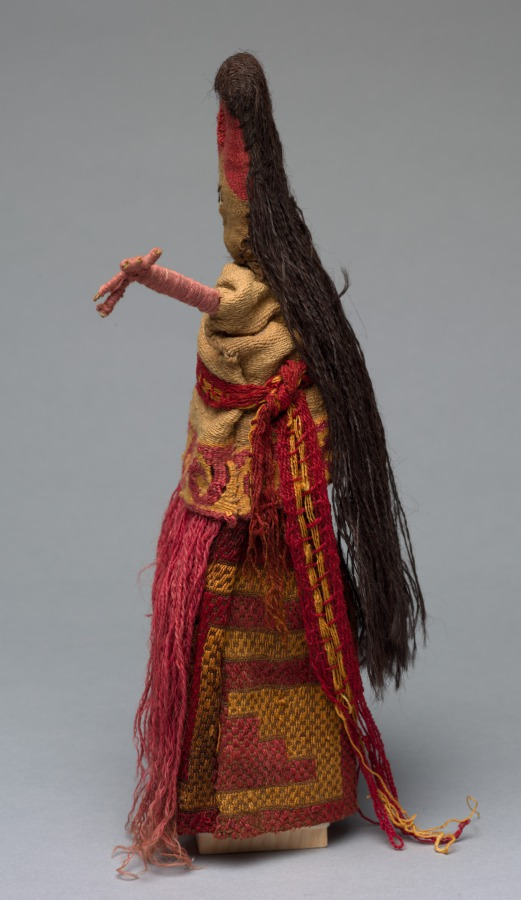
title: Male Figure with Modern Additions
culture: Peru, Central Coast, Chancay people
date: 1100–1500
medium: Original elements include the head and tunic; added elements include the skirt, red fringe, and belt; Cotton, camelid fiber, reeds; Slit tapestry (tunic and face); plain weave with supplementary weft (skirt)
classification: Miscellaneous